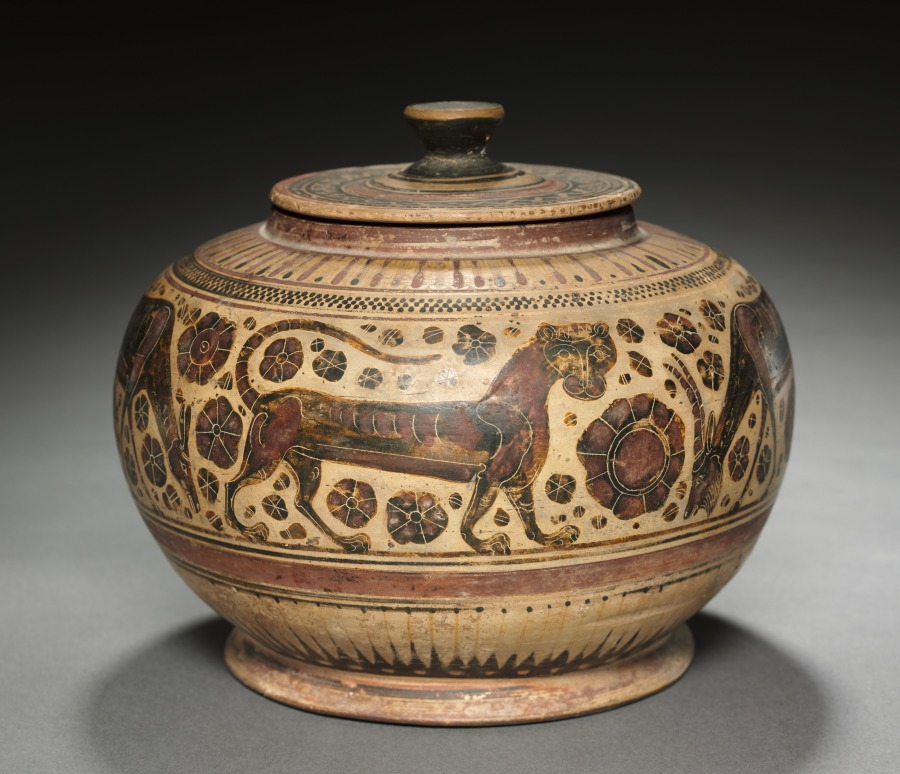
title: Black-Figure Pyxis (Cylindrical Lidded Box): Animals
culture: Greek, Corinthian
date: 600s–500s BCE, with modern painting and incision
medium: ceramic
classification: Ceramic